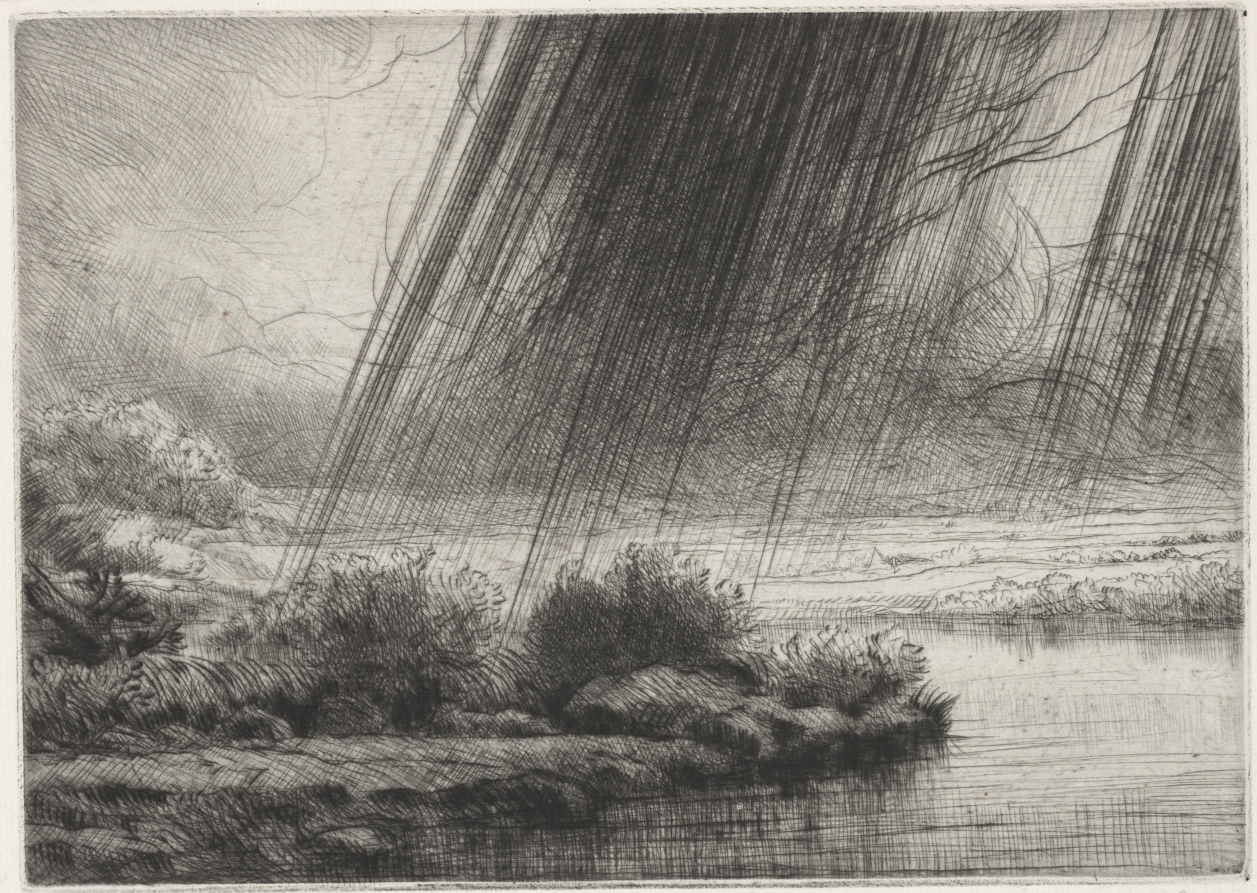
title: A Storm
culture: France, 19th century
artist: Alphonse Legros (French, 1837–1911)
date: c. 1857–1911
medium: etching and drypoint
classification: Print